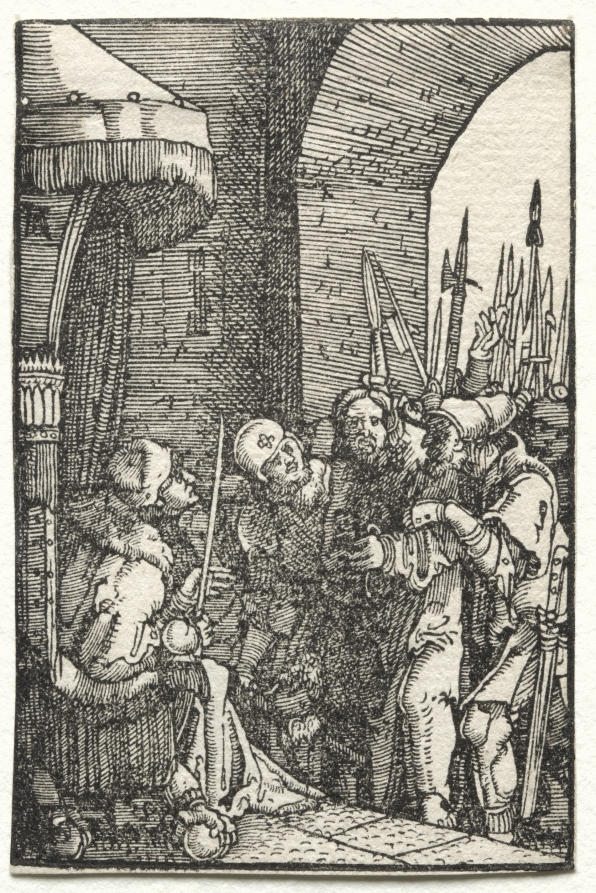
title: The Fall and Redemption of Man: Christ before Pilate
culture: Germany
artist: Albrecht Altdorfer (German, c. 1480–1538)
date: c. 1515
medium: woodcut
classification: Print